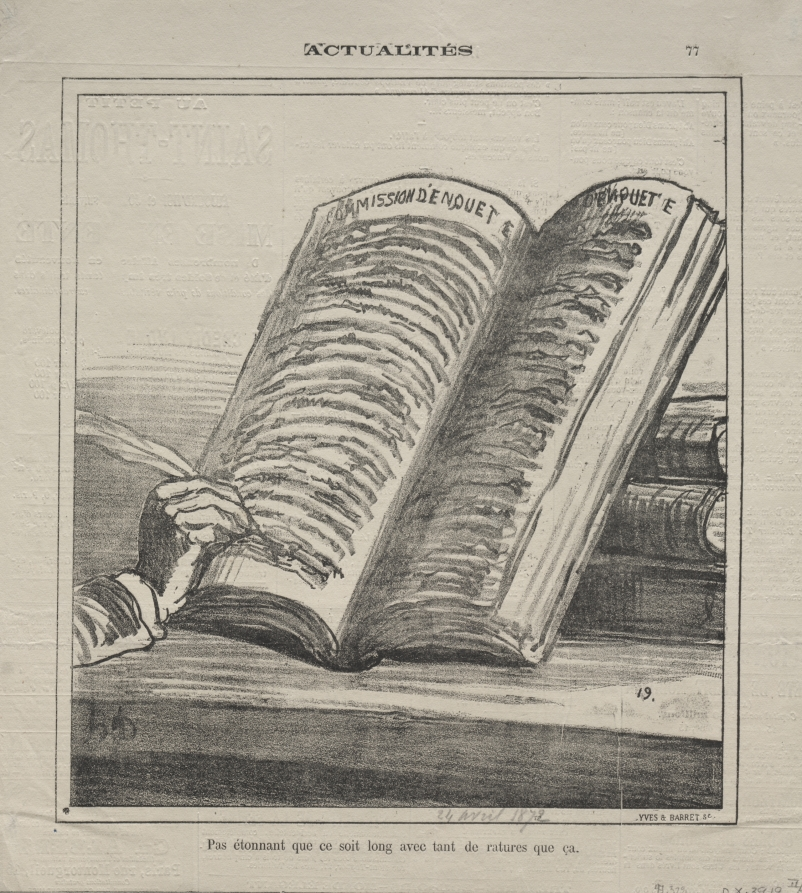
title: It is not surprising that it is long with so many corrections.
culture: France, 19th century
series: News of the Day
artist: Honoré Daumier (French, 1808–1879)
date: 1872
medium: lithograph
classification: Print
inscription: Lower margin, pencil: 24 avril 1872 ; printed: YVES & BARRET sc. ; lower left corner, pencil: 47.328 / DX.3919 II/II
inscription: Above image, printed: ACTUALITÉS. / 77 ; Below image, printed: Pas étonnant que ce soit long avec tant de ratures que ça.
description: This print was published in Le Charivari (April 24, 1872) as plate 77 from the series News of the Day.